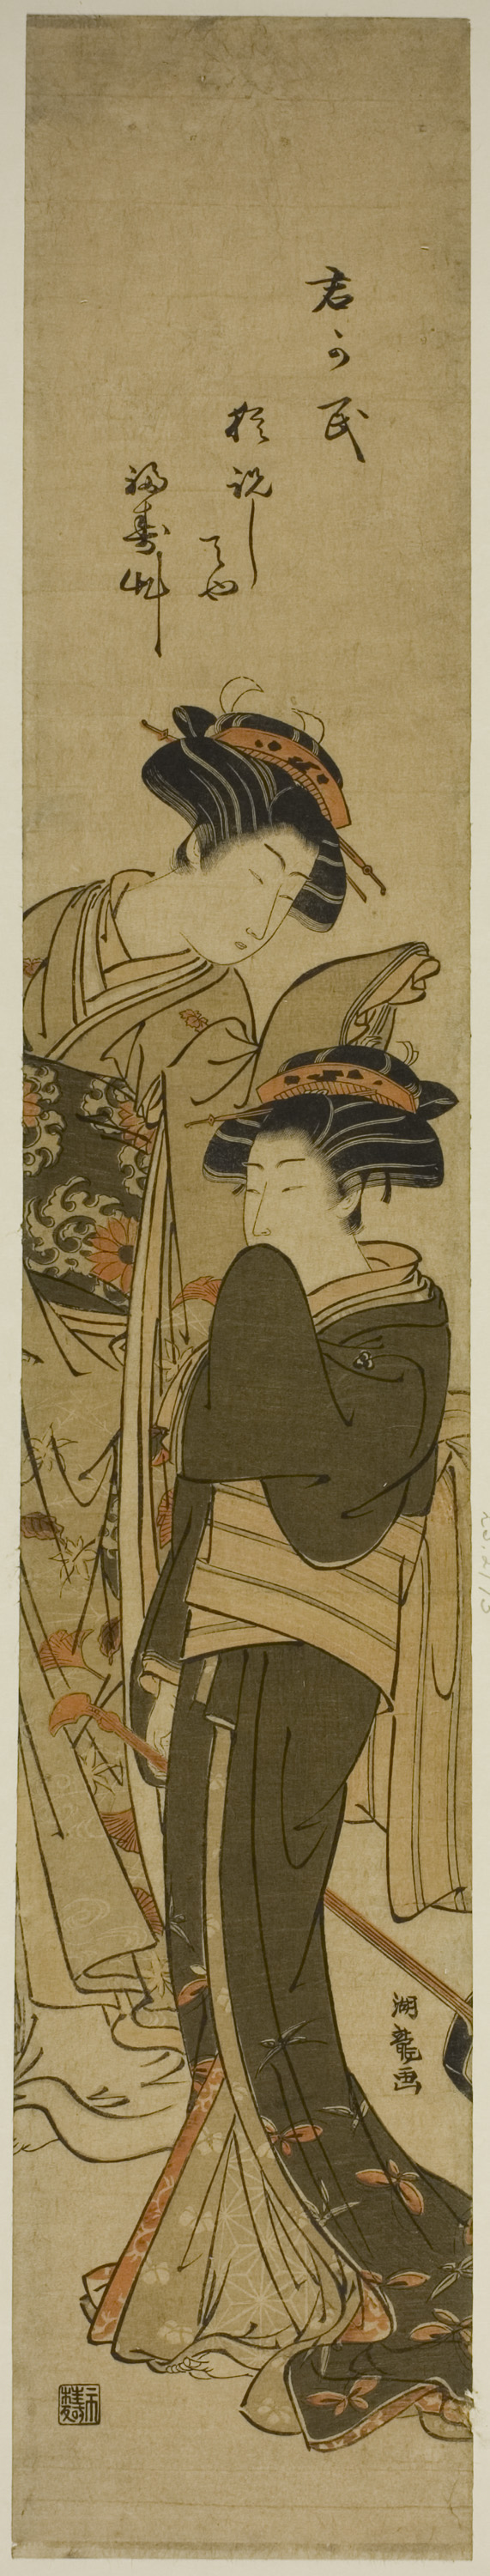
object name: Print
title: Two Courtesans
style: Japanese (culture or style)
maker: Isoda Koryusai (Japanese, 1735-1790)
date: c. 1776/81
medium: Color woodblock print; hashira-e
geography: Japan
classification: woodblock print; print; asian art